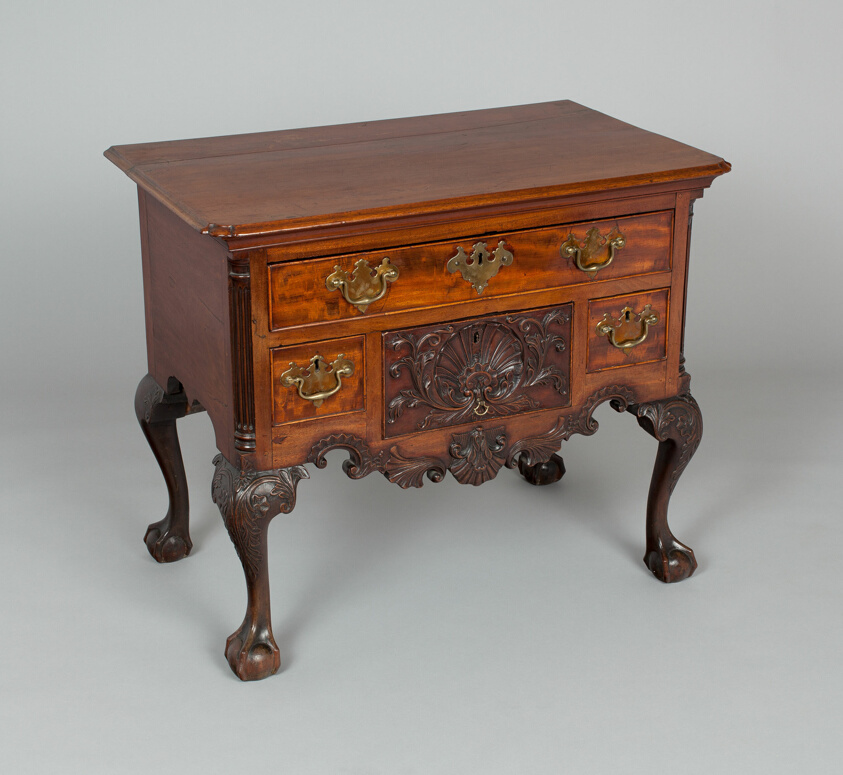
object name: Furniture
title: Dressing Table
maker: Artist unknown (American, 18th century); Philadelphia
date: 1760–90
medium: Mahogany, American sweetgum, yellow pine, and Northern white cedar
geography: Philadelphia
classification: table; furniture; american decorative arts; american arts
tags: fashion, furniture